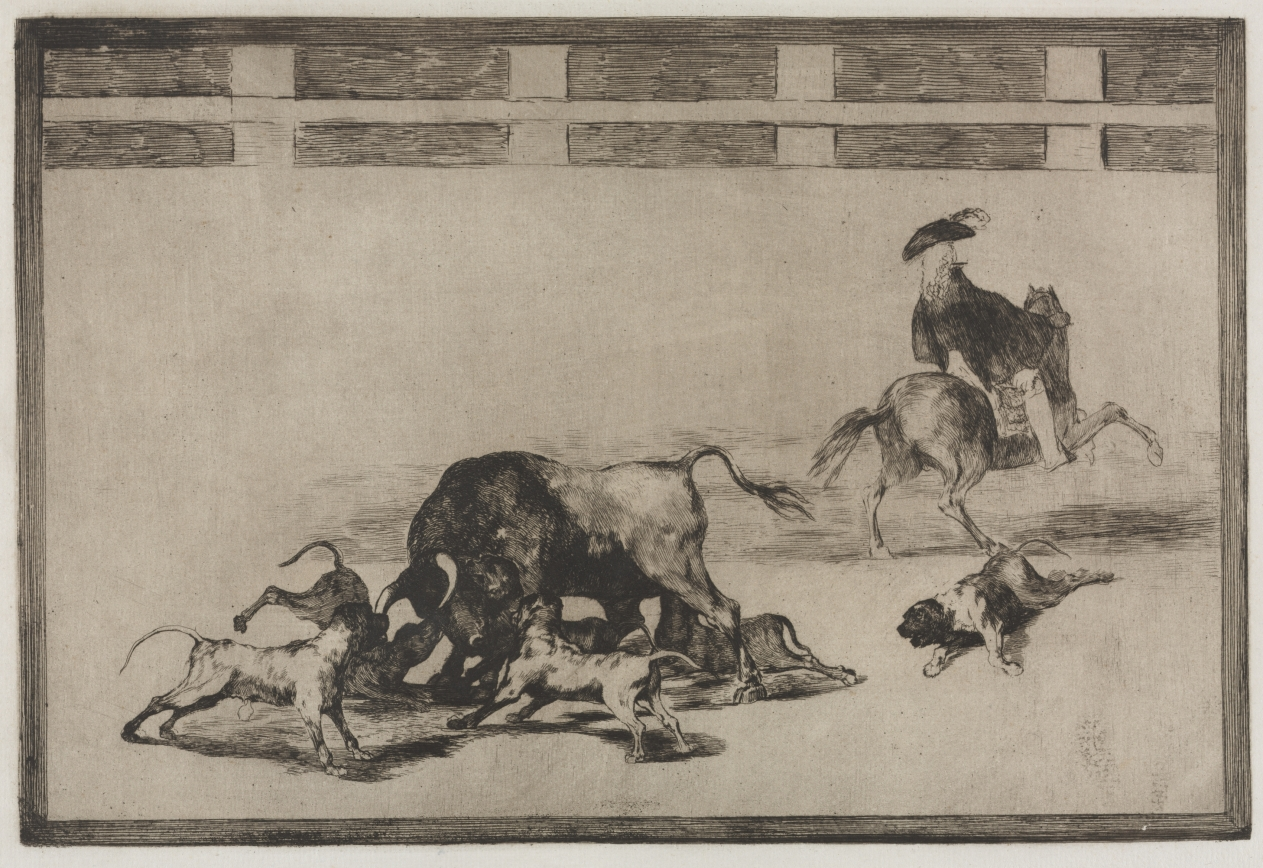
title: Bullfights: They Loose Dogs on the Bull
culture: Spain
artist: Francisco de Goya (Spanish, 1746–1828)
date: 1816, printed 1876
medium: engraving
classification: Print